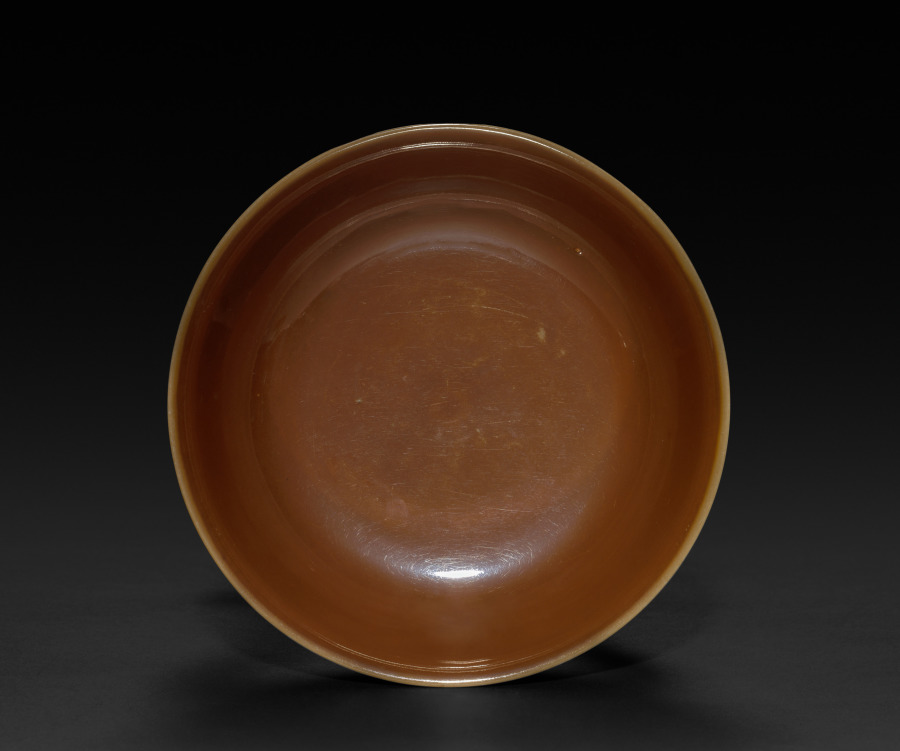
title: Dish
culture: China, Jiangxi province, Jingdezhen kilns, Qing dynasty (1644-1911), Yongzheng mark and reign (1723-35)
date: 1723–35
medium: porcelain with café-au-lait glaze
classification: Ceramic